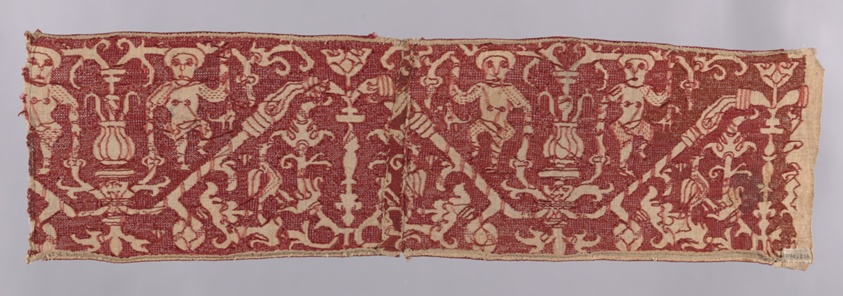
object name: Textile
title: Border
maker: Spain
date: 1575/1625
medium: Linen, plain weave; pulled thread work embroidered with silk back, running and two-sided Italian cross stitches; edged with darning stitches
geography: Spain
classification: textile; needlework (visual works)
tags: flowers, cherubs, urns